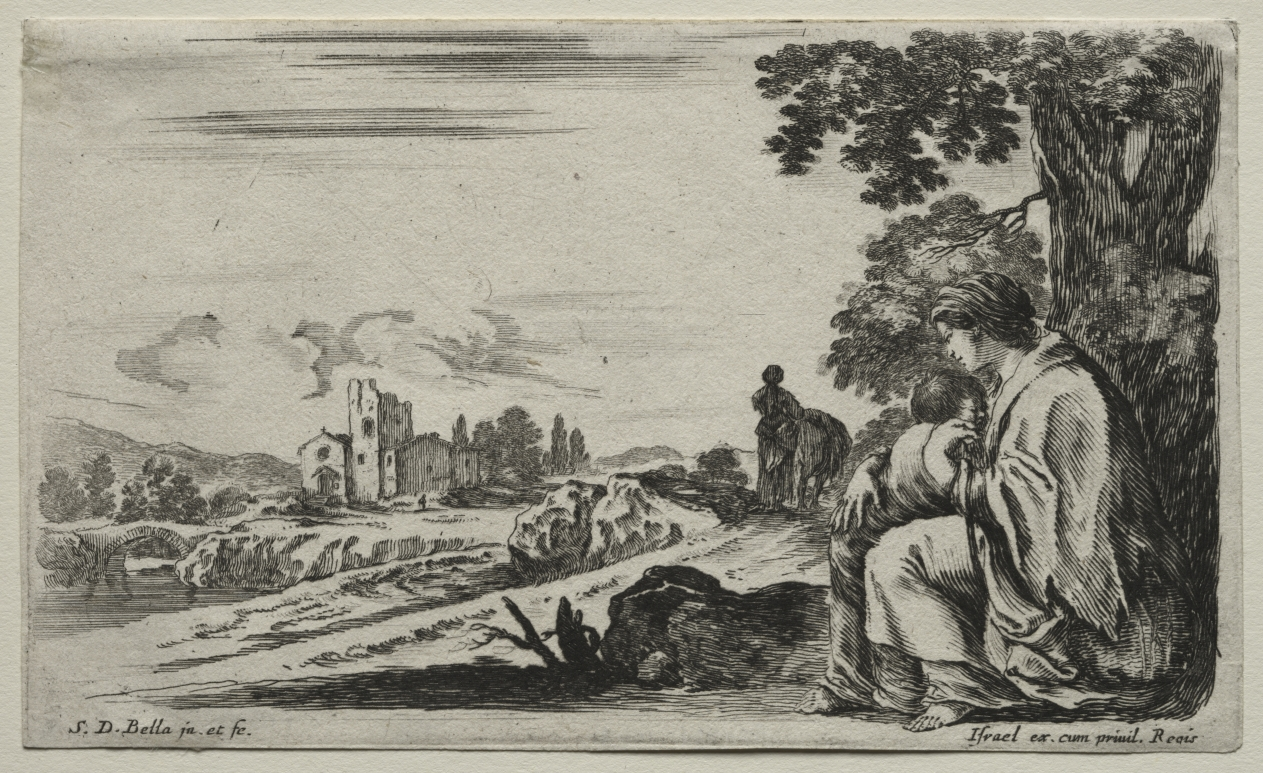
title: Various Figures and Landscapes: A Poor Nurse Seated under a Tree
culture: Italy, 17th century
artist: Stefano Della Bella (Italian, 1610–1664)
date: 1649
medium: etching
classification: Print